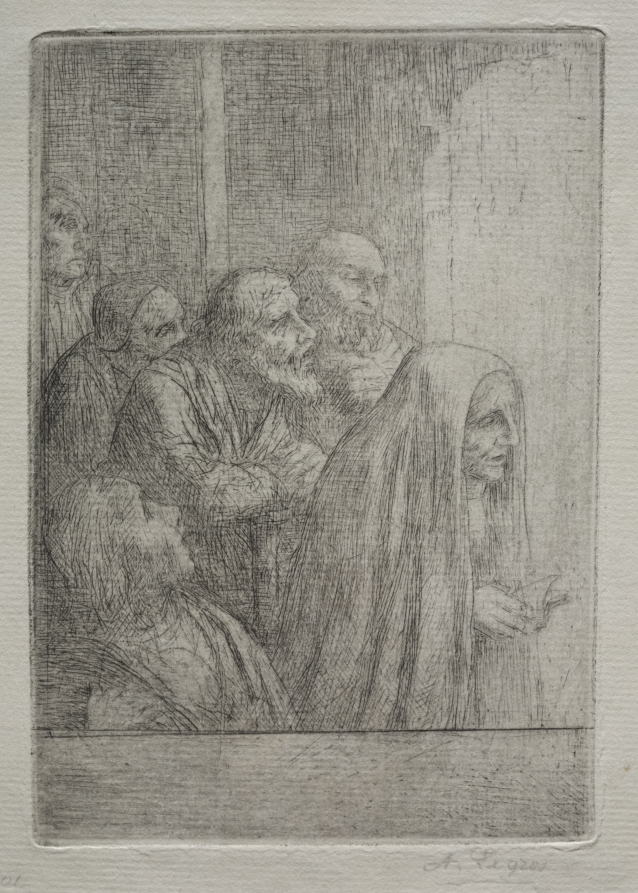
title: Midnight Mass (Le Messe de Minuit)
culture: France, 19th-20th century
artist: Alphonse Legros (French, 1837–1911)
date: c. 1857–1911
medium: etching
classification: Print